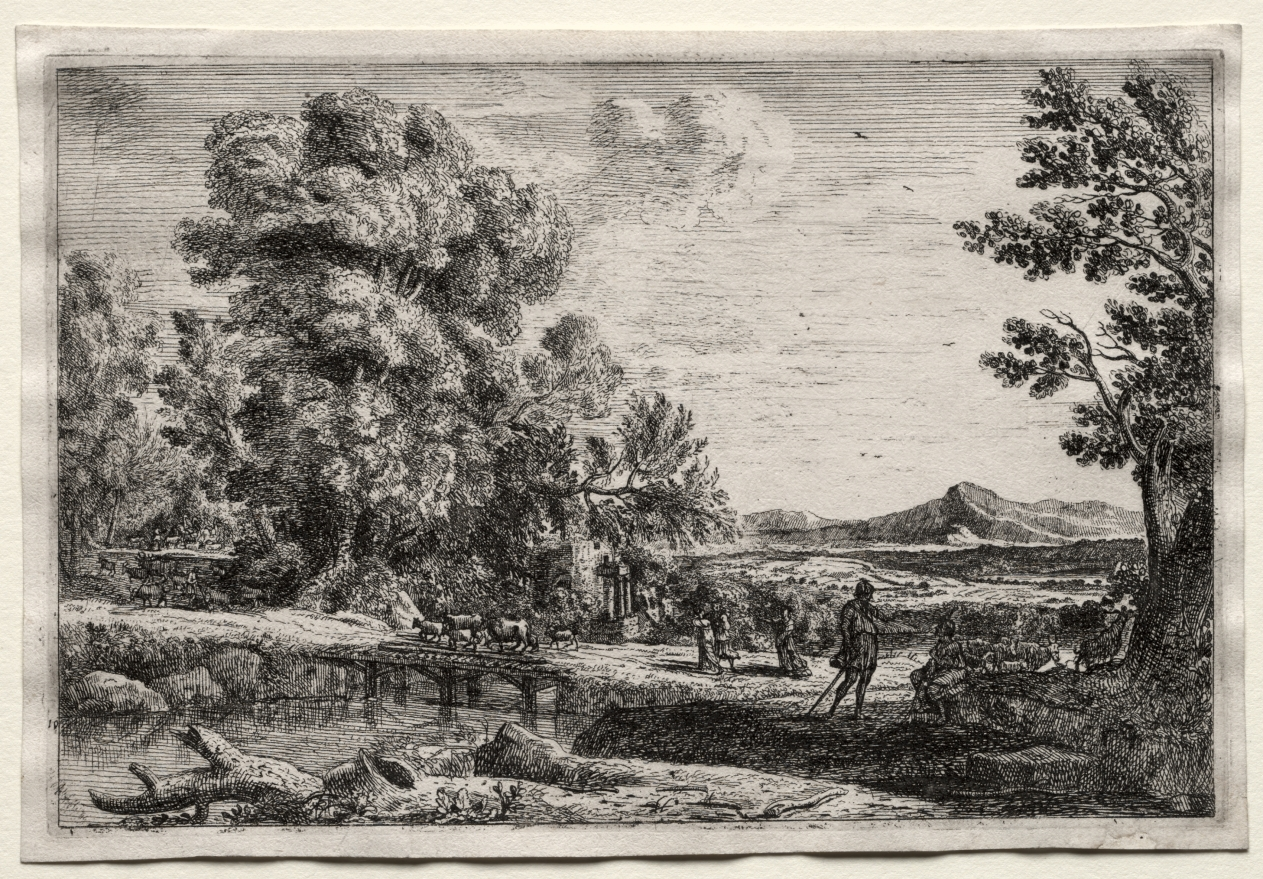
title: The Wooden Bridge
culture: France, 17th century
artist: Claude Lorrain (French, 1604–1682)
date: 1638–41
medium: etching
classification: Print